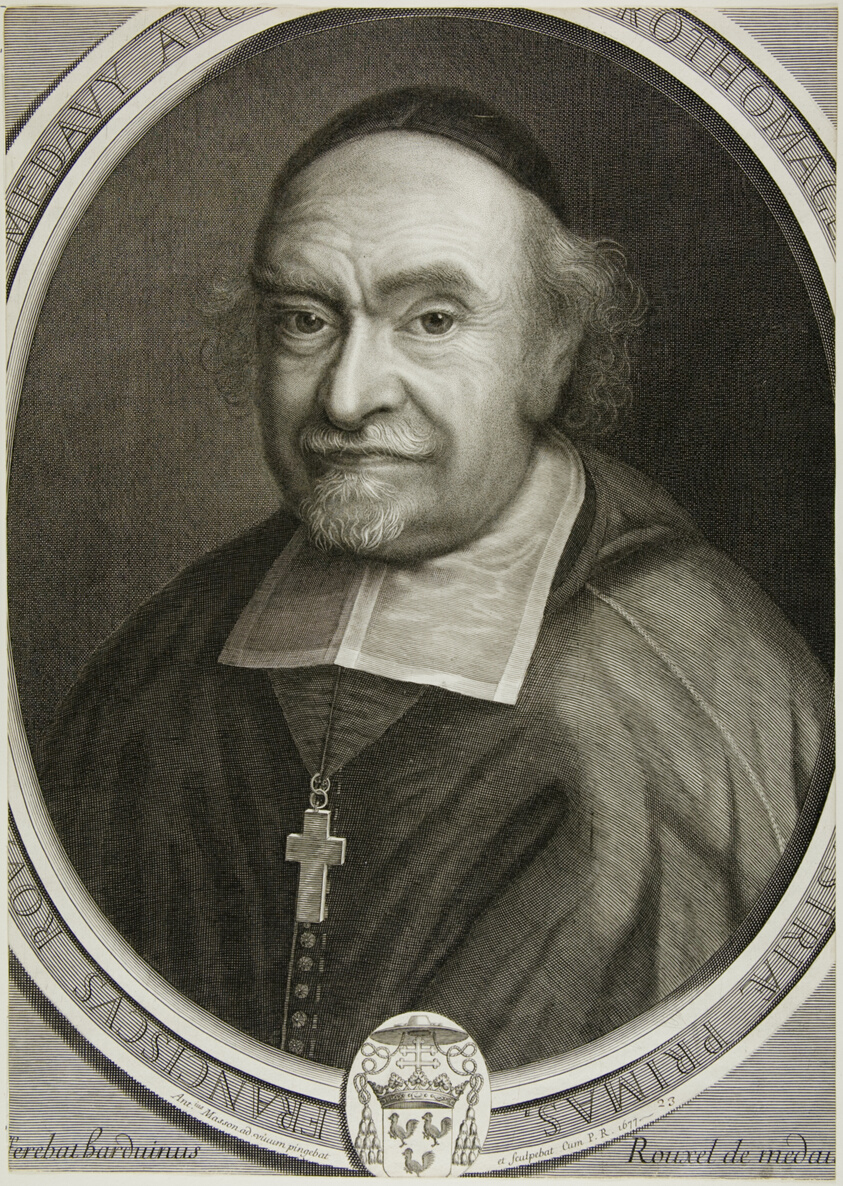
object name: Print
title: François Rouxel de Medavy, Archbishop of Rouen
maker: Antoine Masson (French, 1636-1700)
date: 1677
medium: Engraving on paper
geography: France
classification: engraving; print; prints and drawing